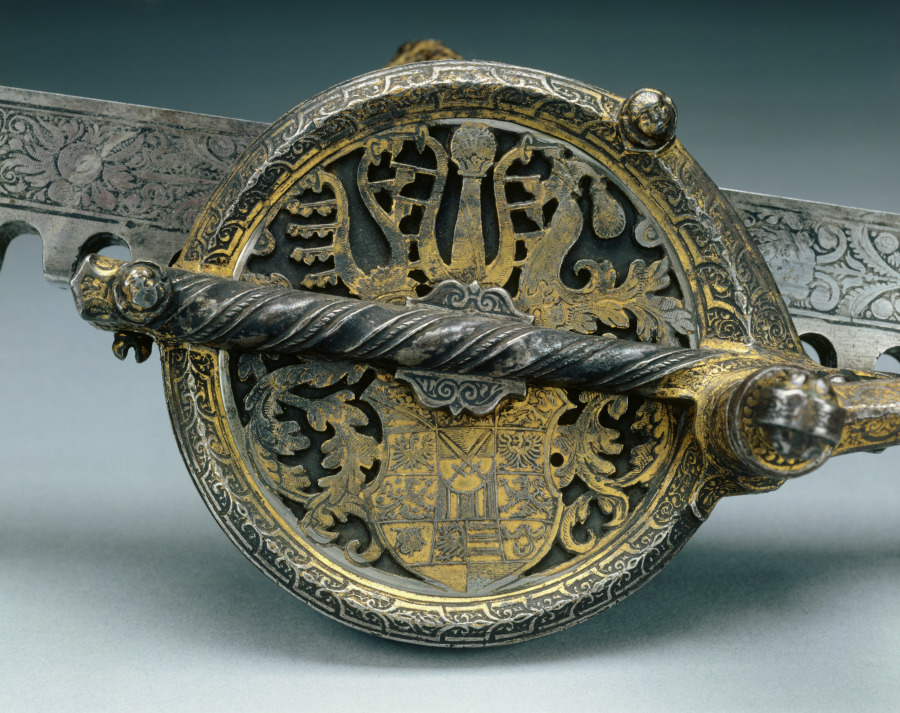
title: Cranequin with Arms of Elector Augustus I of Saxony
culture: Germany, Saxony, 16th century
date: c. 1553–73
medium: steel; etched, chased and gilded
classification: Arms and Armor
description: This winder or cranequin was for Prince Elector Augustus I, a member of the ruling elite in the Holy Roman Empire. Augustus, powerful and wealthy, had even the most practical instruments ornately decorated, including this cranequin.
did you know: Augustus was a marksman who took part in crossbow competitions. He had a large collection and often gave them to friends.